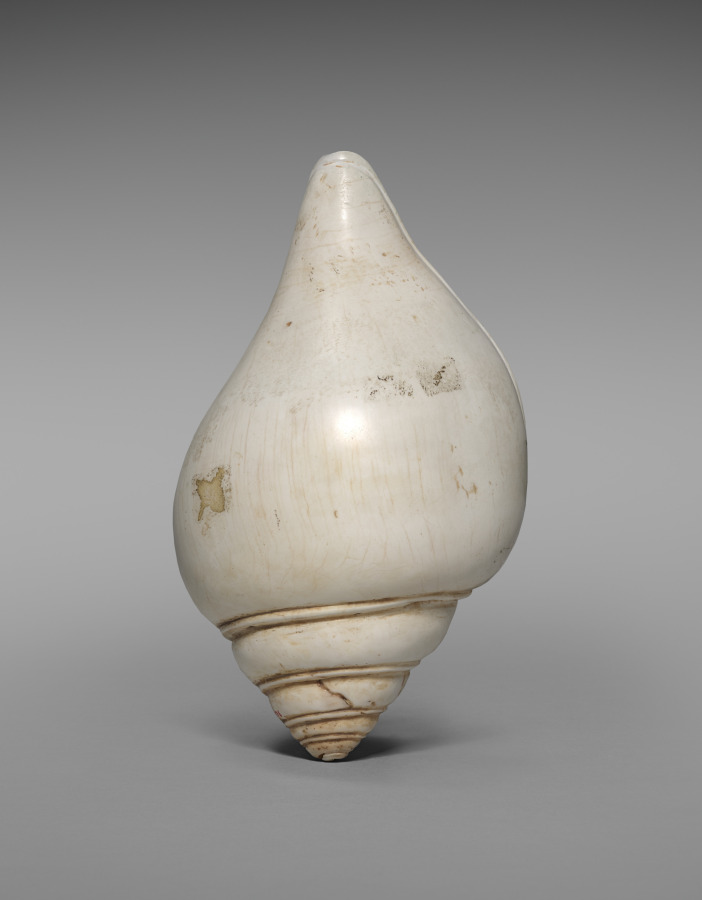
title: Ritual conch shell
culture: Cambodia, Khmer, Angkor Period, 12th-13th Century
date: 1100s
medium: shell and bronze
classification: Sculpture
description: A royal temple like Banteay Chhmar was built for performing rituals and to honor images of gods, Buddhas, and other sacred or enlightened beings for the sake of the kingdom’s protection and ongoing prosperity. Conch shells were blown at the start of rituals to make the sound corresponding to the syllable om. The dancing figure of Hevajra, a Buddhist being of enlightenment with eight heads, sixteen arms, and four legs, has been worked into the bronze embellishment of the shell. Hevajra was elevated to a prominent position in Khmer Buddhism of the Angkorian period as the standard figure denoting the practice of rituals prescribed in a text called the Hevajra-tantra. The tripod stand with three serpents is probably not original to the shell.